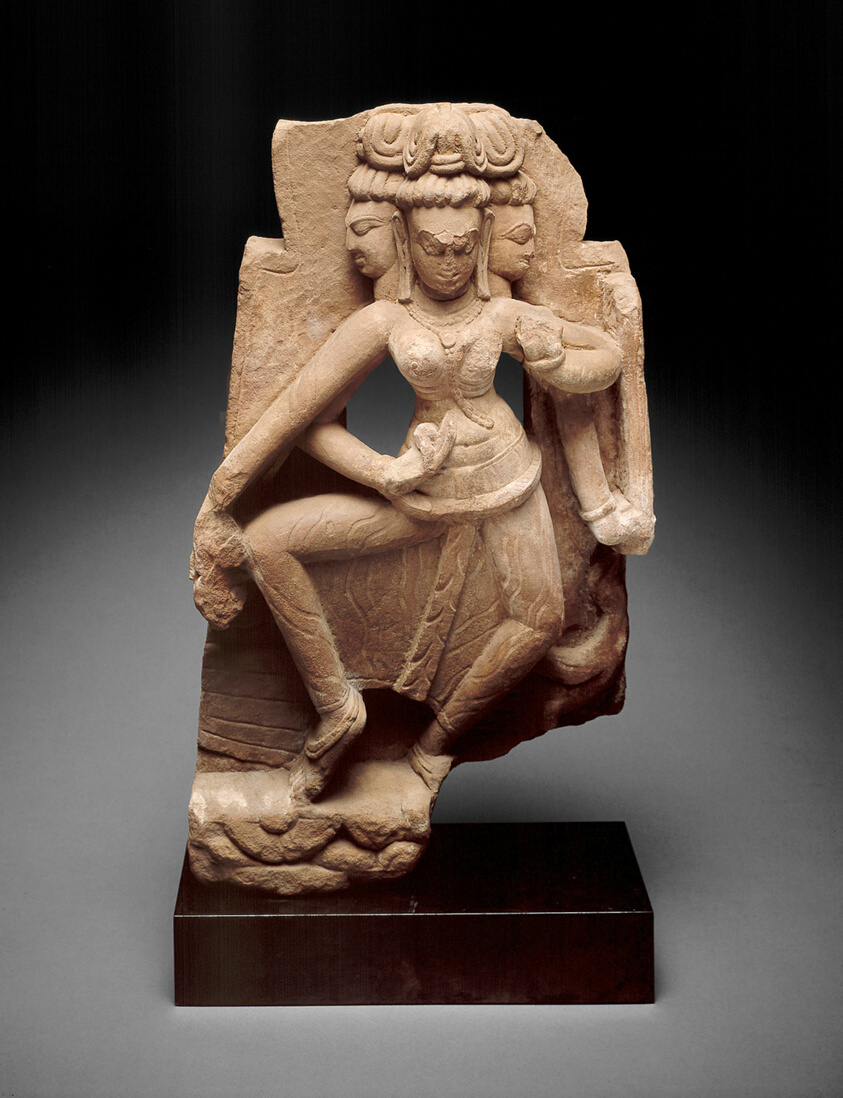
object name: Sculpture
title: Dancing Mother Goddess Brahmani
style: South Asian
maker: India; Madhya Pradesh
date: 10th century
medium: Sandstone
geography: Madhya Pradesh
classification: sandstone; stone; sculpture; asian art